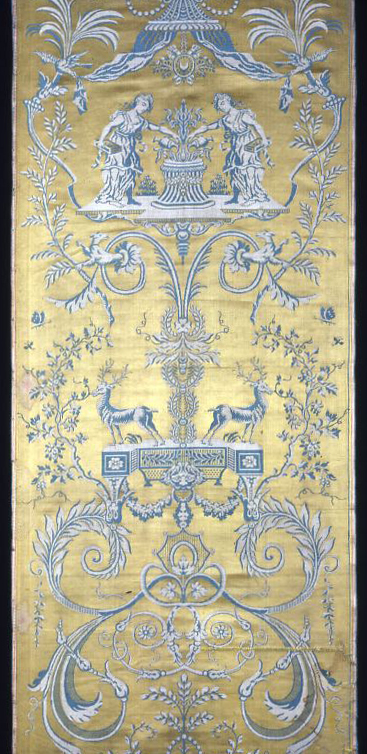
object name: Textile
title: Panel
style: directoire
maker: France, Lyon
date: Directoire period, c. 1785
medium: Silk, satin weave with plain interlacings of secondary binding warps and self-patterning ground wefts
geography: Lyon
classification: textile; weaving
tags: swags, garlands, women